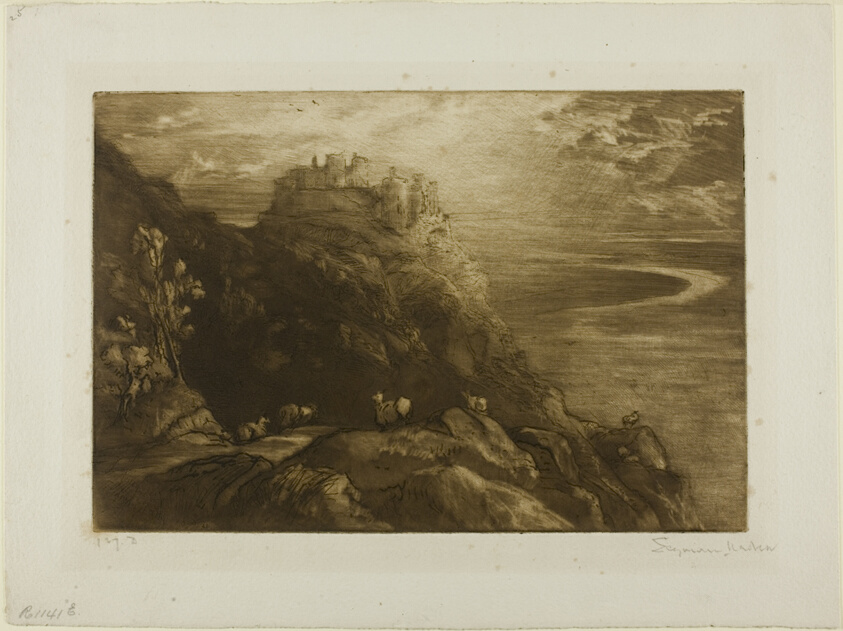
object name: Print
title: Harlech, No. I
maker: Francis Seymour Haden (English, 1818-1910)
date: c. 1874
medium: Etching and mezzotint on cream wove paper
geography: England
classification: mezzotint; print; prints and drawing